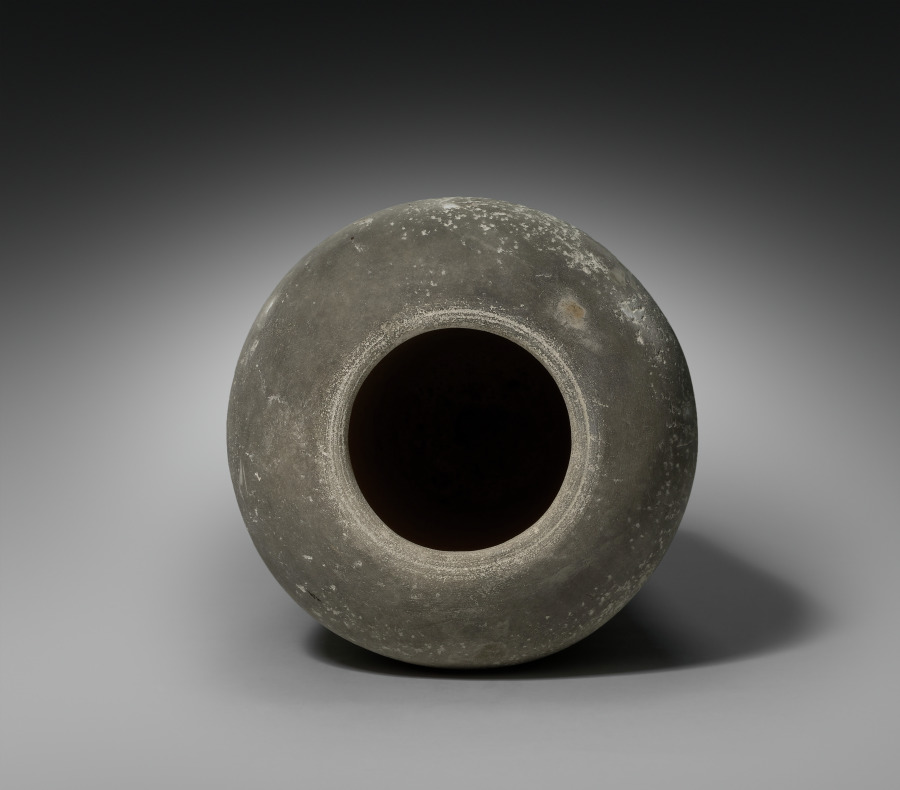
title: Canopic Jar with Lid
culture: Egypt, New Kingdom (1540–1069 BCE), Dynasty 18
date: 1540–1296 BCE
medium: limestone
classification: Funerary Equipment